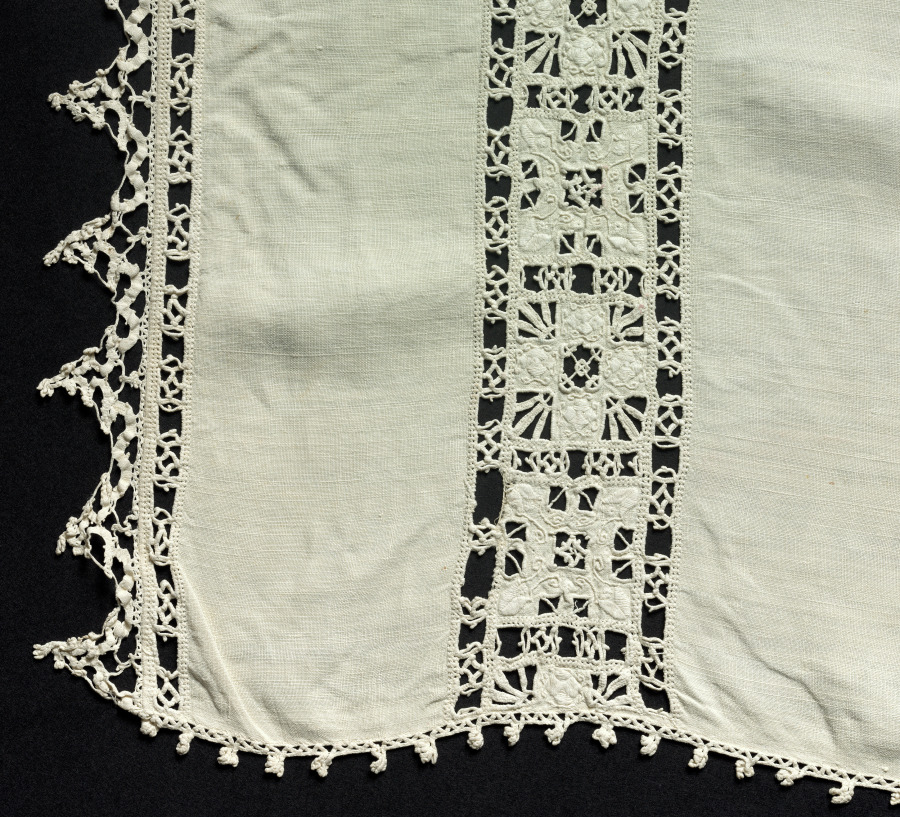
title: Lace Cloth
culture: Italy, Venice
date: 1560–99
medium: Linen: needle lace (cutwork) and bobbin lace edging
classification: Lace